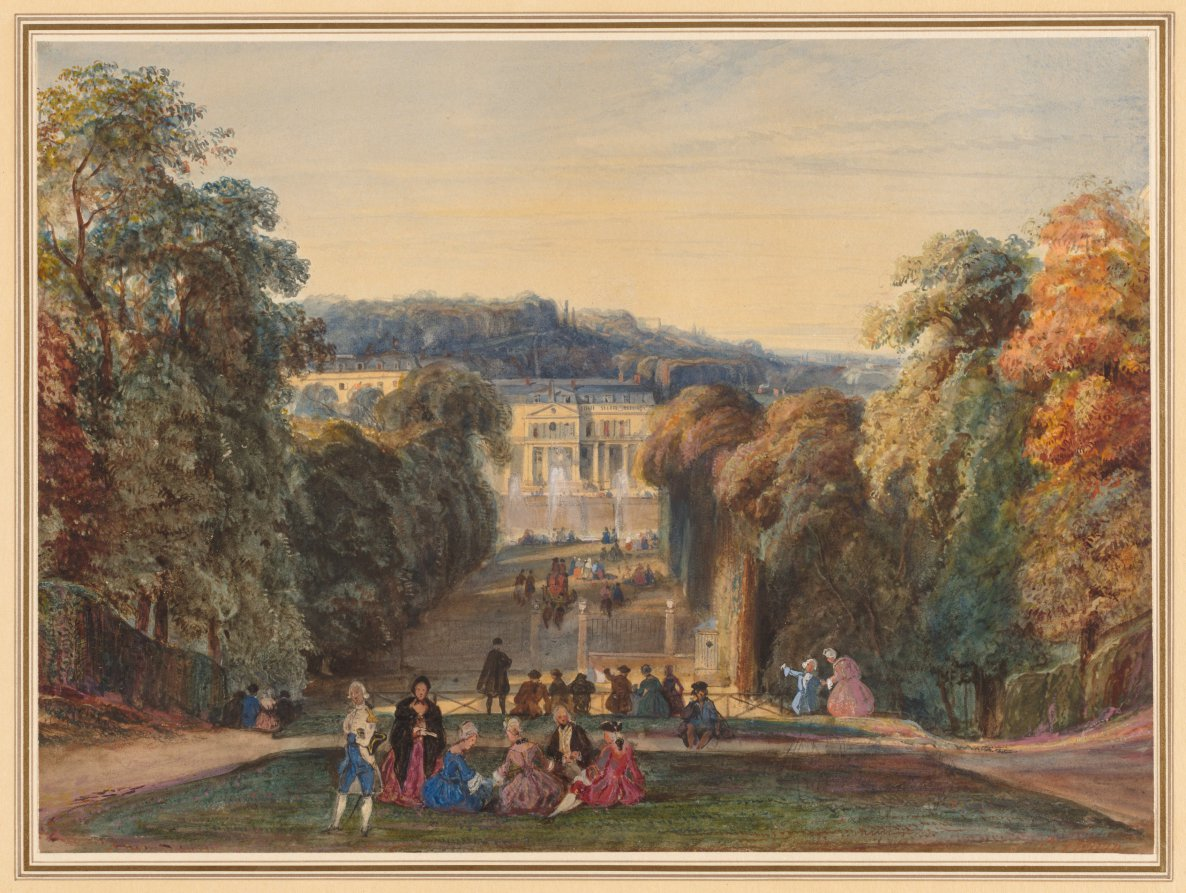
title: In the Park of Saint Cloud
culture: France, 19th century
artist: Constant Troyon (French, 1810–1865)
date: 1800s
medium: watercolor and gouache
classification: Drawing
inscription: signed, lower right, in orange gouache: C Troyon ; VERSO, upper left, in graphite: [illegibel, masked] ; lower right, in graphite: URGENT / 3 x 3 1/2 PEARL / 2 1/2 ÷ 4 [w ?] / PROPORTIONAL / Cream / [illegible, crossed out] trim to[illegible, masked] / [illegible] side / SPECIAL 4 W